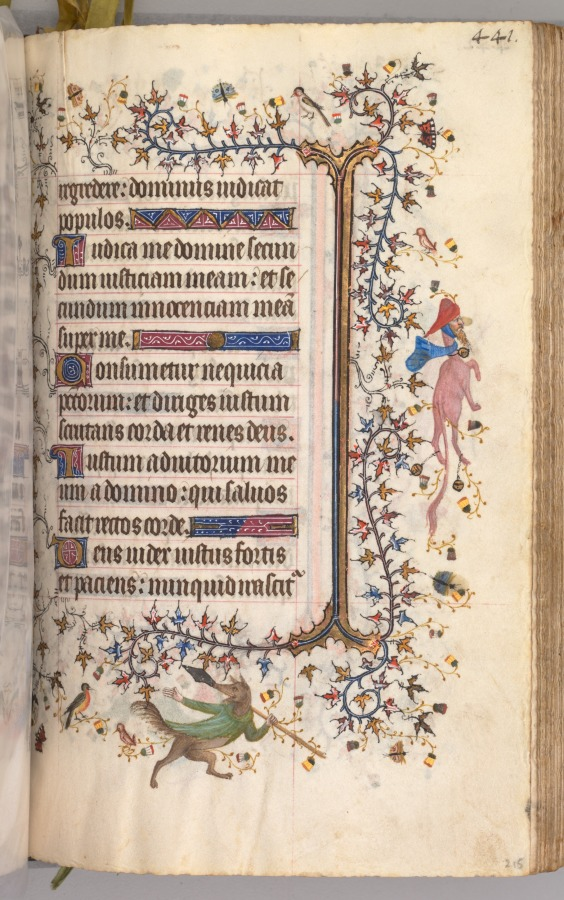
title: Hours of Charles the Noble, King of Navarre (1361-1425): fol. 215r, Text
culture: France, Paris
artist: Master of the Brussels Initials and Associates (French)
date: c. 1405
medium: ink, tempera, and gold on vellum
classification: Bound Volume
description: This precious volume was obviously highly prized by its owner, the French-born King of Navarre, who had his coat of arms painted on no less than twenty folios. Rather than directly commissioning this manuscript from a specific workshop, it seems that Charles the Noble acquired his book of hours -- perhaps ready-made for the luxury market -- while on a trip to Paris in 1404-05. A collaborative effort, six painting styles are evidenced within the pages of this codex, those of two Italians, two Frenchmen, and two Netherlanders. The painter who was responsible for the planning and decoration of the book, and who produced seventeen of the large miniatures, was a Bolognese artist known as the Master of the Brussels Initials. His principal assistant, responsible for most of the borders, was a Florentine who signed his name "Zecho" da Firenze on folio 208 verso.